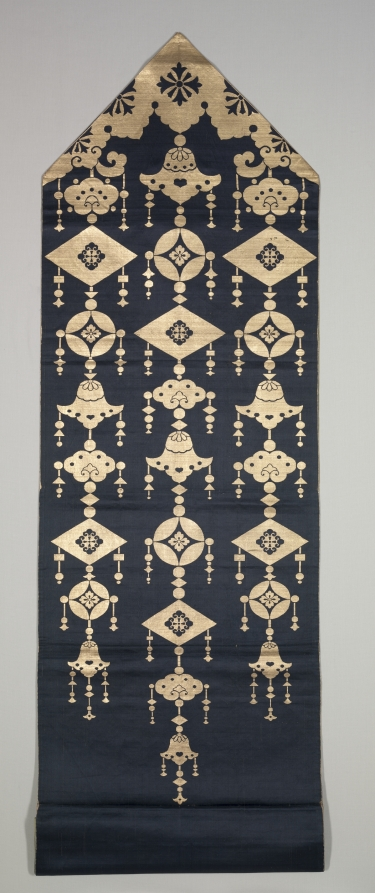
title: Sumibōshi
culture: Japan, Edo period (1615–1868)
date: 1800–1850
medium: silksatin weave; metal thread weft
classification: Garment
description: Sumibōshi literally means "hat with corners" in Japanese, and refers to the square shape made when this textile hat is tied on the head. Actors playing the roles of religious figures in Nō theater often wear this kind of cap. It derives from Buddhist vestments.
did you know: The design on this hat is meant to resemble metal hanging ornaments adorning the interiors of Japanese Buddhist temples.